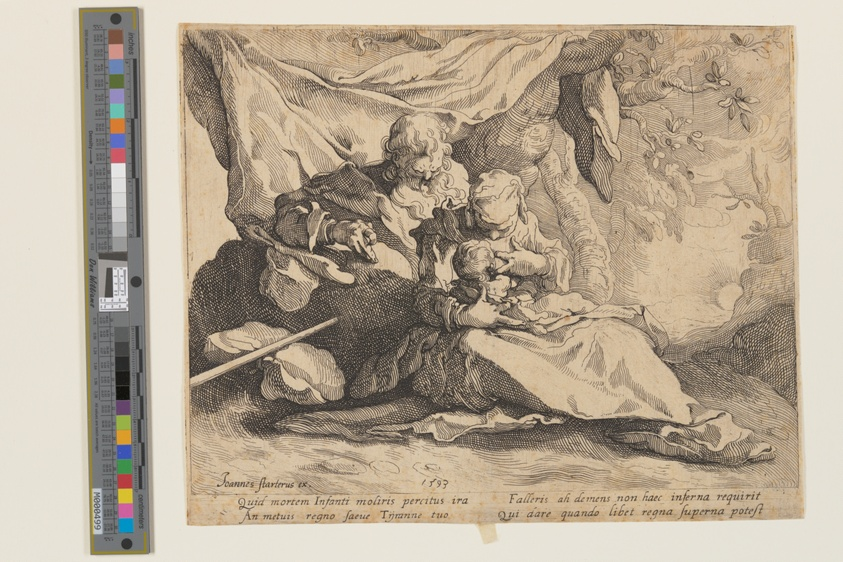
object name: Print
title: The Rest on the Flight to Egypt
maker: Gerrit Pietersz. Sweelink; Dutch, 1566–before 1612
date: 1593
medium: Etching on ivory laid paper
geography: Netherlands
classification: print; paper; prints and drawing; etching